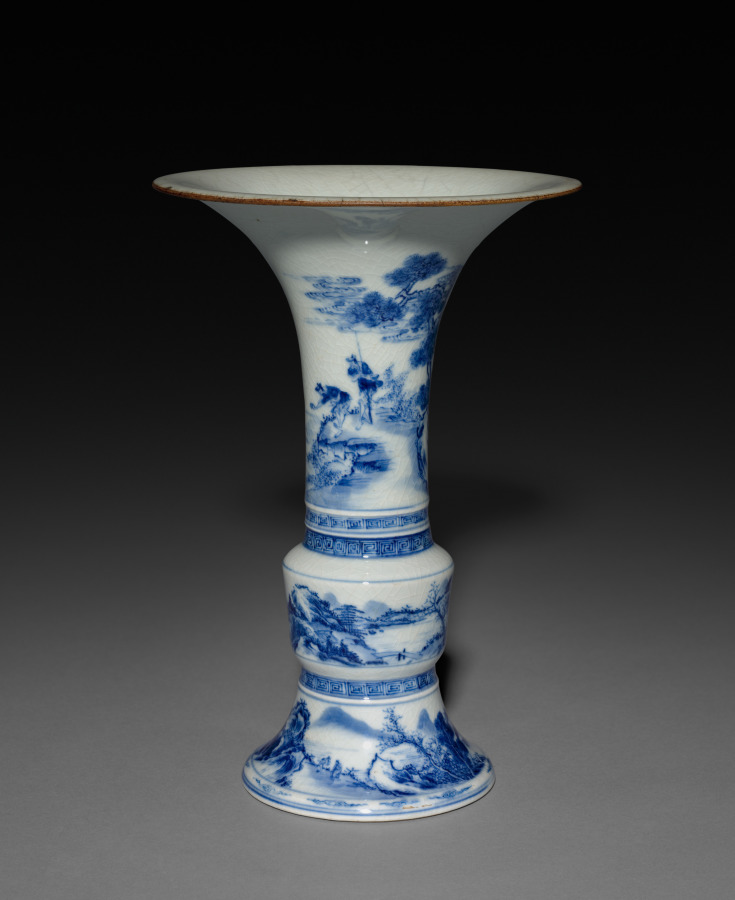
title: Beaker Vase in Form of Archaic Gu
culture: China, Jiangxi province, Jingdezhen kilns, Qing dynasty (1644-1911), Yongzheng reign (1723-35)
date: 1723–35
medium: porcelain with underglaze blue decoration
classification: Ceramic